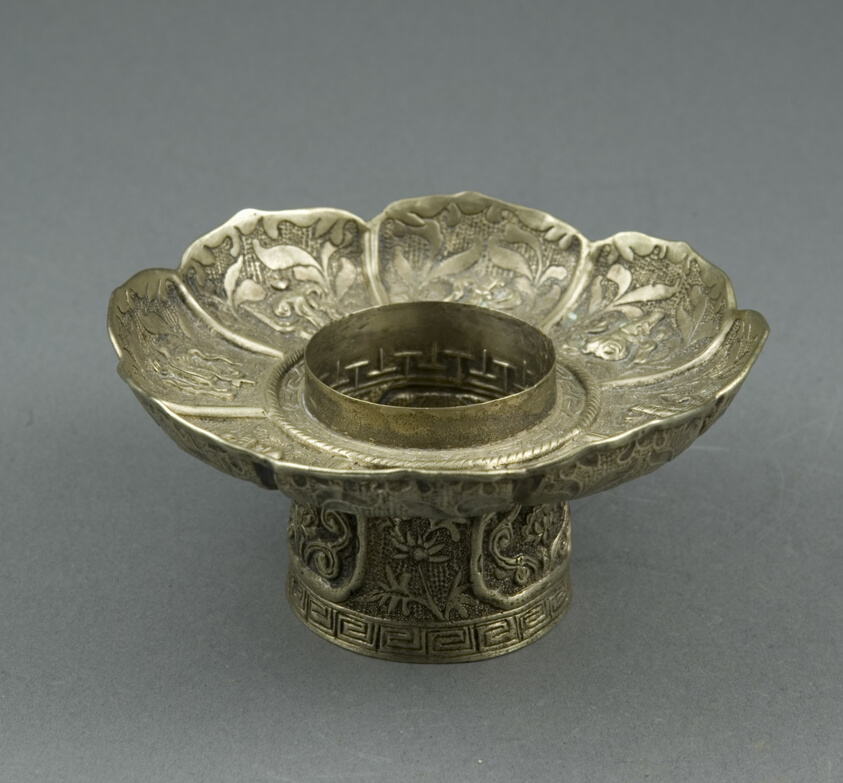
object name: Religious/Ritual Object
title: Lotus-Shaped Altar Bowl Stand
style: Himalayan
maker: Tibet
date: 18th century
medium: Silver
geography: Tibet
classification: ceremonial object; silver; metal; asian art; ritual objects